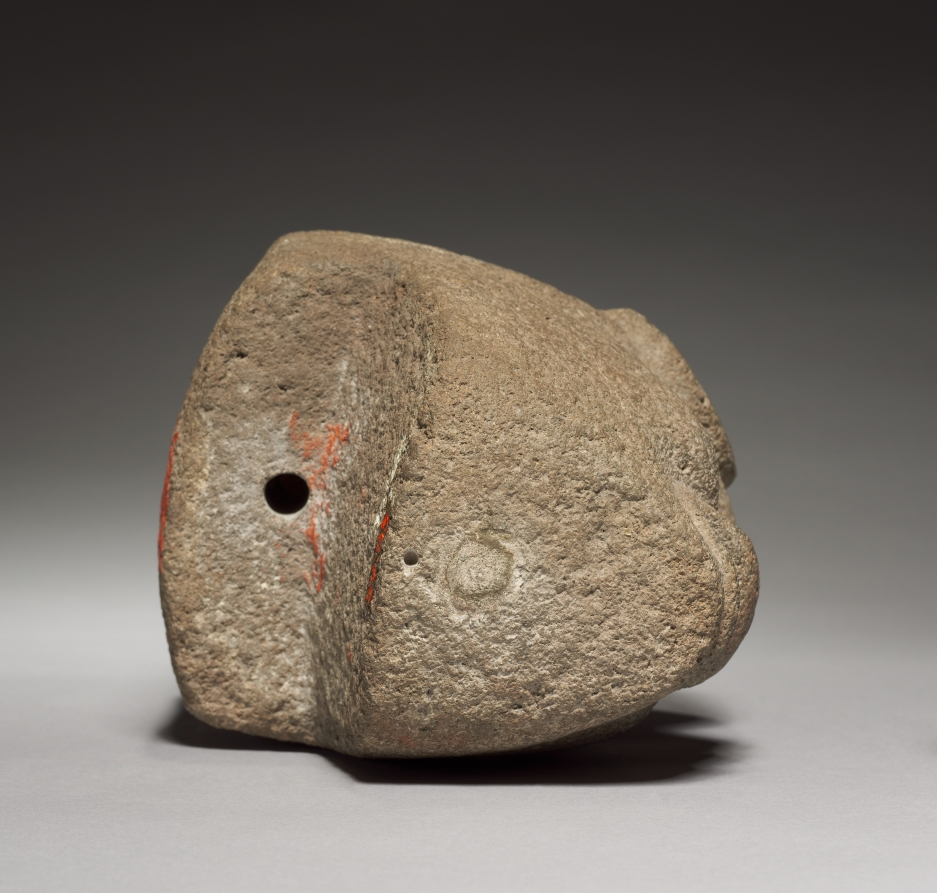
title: Head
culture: Mexico, Classic Veracruz (Totonac or Tajin)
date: 600–1100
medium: stone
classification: Sculpture